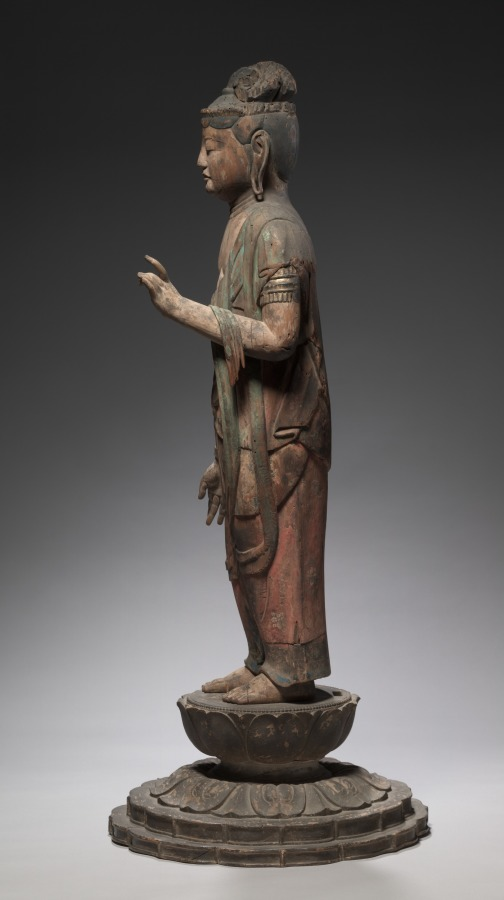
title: Shō Kannon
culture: Japan, Heian period (794–1185)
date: 900s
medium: Wood with traces of color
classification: Sculpture